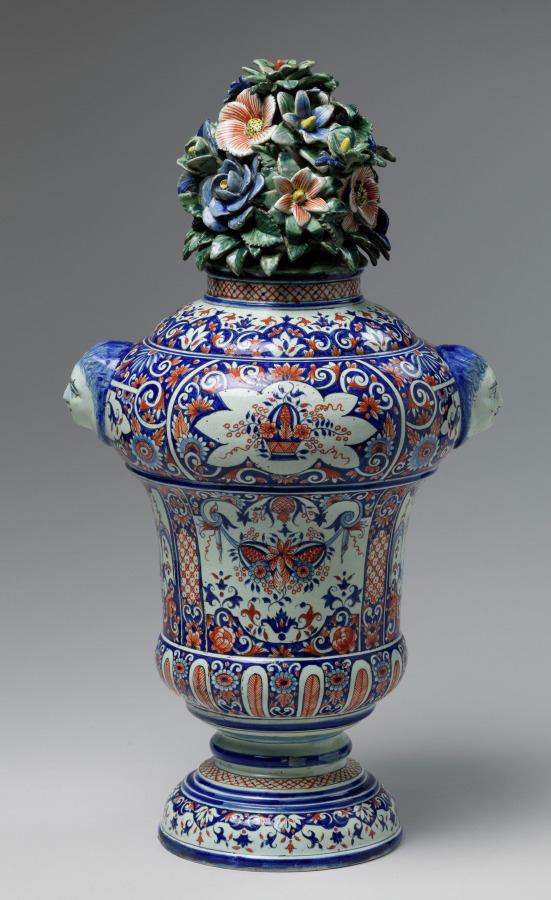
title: Vase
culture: France, Paris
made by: Samson & Co. (French)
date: early 1900s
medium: faience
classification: Ceramic